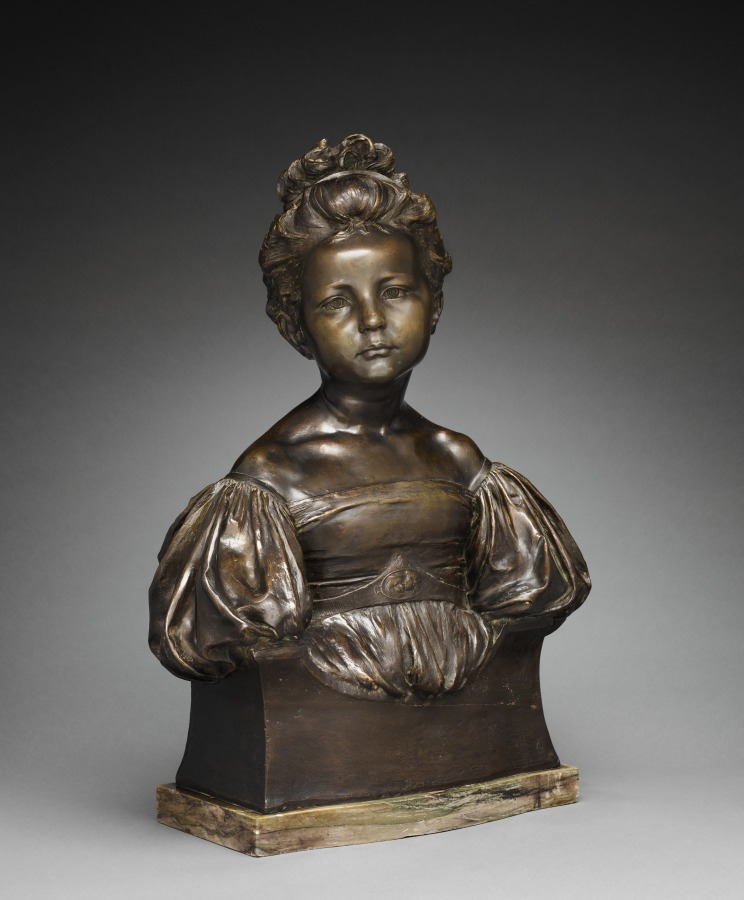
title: The Age of Innocence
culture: England, 19th century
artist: Alfred Drury (British, 1856–1944)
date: 1897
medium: bronze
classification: Sculpture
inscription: signed and dated: A. DRURY 97.